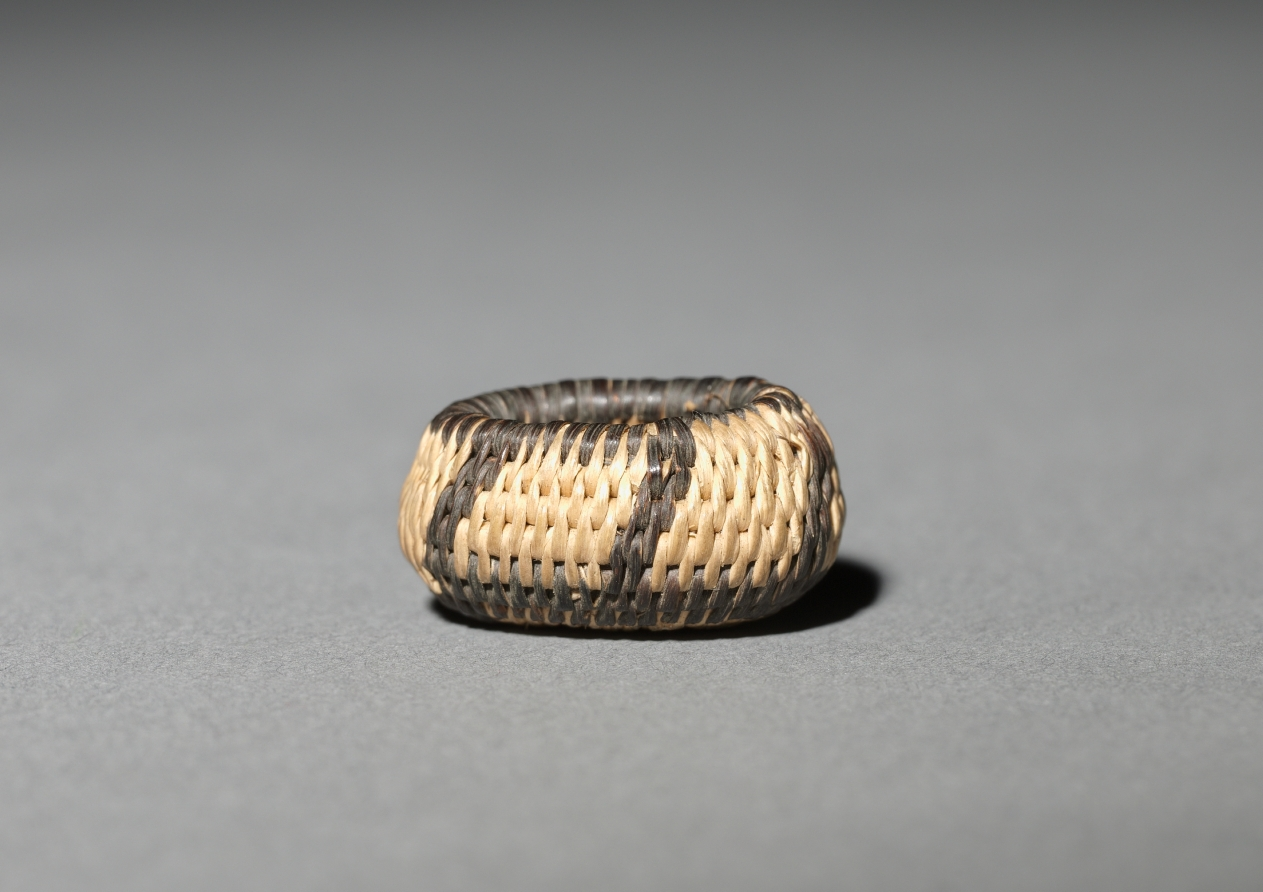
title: Miniature Rhomboidal Basket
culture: California, Pomo, 20th century (?)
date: Early 1900s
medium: coiled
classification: Basketry